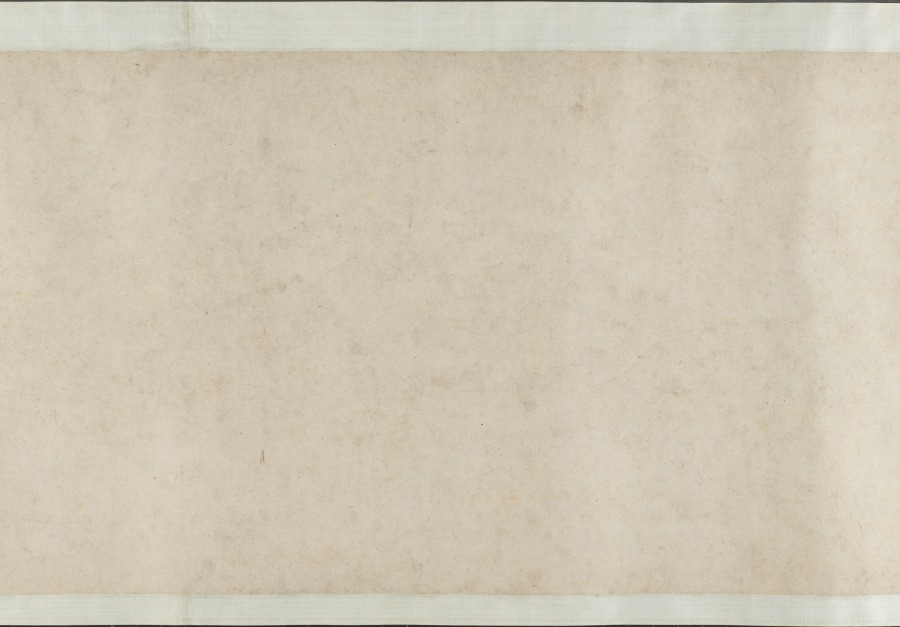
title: Garden for Solitary Enjoyment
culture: China, Ming dynasty (1368–1644)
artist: Qiu Ying (Chinese, 1494–1552)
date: 1515–52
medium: Handscroll; ink and light color on silk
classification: Painting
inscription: Accompanying text of an essay together with seven poems of Sima Guang (1019–1086) and one poem of Su Shi (1037–1101) written by Wen Zhengming (1470–1559) in 1558.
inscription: 2 colophons and 82 seals: 4 seals of Wen Zhengming 文徵明 (1470–1559); 59 seals of Xiang Yuanbian 項元汴 (1525–1590); 1 colophon, dated 1644, and 7 seals of Xiang Yukui 項禹揆 (c. late 1500s–1659); 1 colophon, dated 1880, and 2 seals of Weng Tonghe 翁同龢 (1830–1904); 2 seals of Ch'eng Chen-i (19th c.); 1 seal of Han Ch'ung (19th c.); 4 seals of Wan-go H. C. Weng 翁萬戈 (1918–2020); 3 seals unidentified.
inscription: Colophon by Xiang Yukui 項禹揆 (c. late 1500s–1659): The painting of The Garden for Self-enjoyment on the right by Shih-chou, Mr. Qiu [Qiu Ying] is in the style of Li Lung-mien. Its mood is peaceful, as if meeting the ancient gentlemen face to face among the brushes and silk; it lifts one above the sordid bustle of life. Formerly, my late father handed me this scroll which had only the painting without the written essay. I considered asking a good calligrapher to write the essay to add to it but was afraid that the quality of the writing would not match the painting. Several years later, I saw at a friend's house this essay and poems (of Ssu-ma Kuang] written by Hengshan [Wen Zhengming], once owned by my grandfather; so I spared no expense to obtain it. I rejoiced at this and said: "The divine swords are finally united. How things are pre-destined!" Now my friend Chang Kung-chao's technique for mounting [painting and calligraphy] is excellent. Therefore by daring to take them out and join them together, I can preserve this beautiful story of singular reunion. Xiang Yukui recorded at Hai-yeh-t'ang [hall] two days before New Year's Eve in the jiasheng year of the Chongzhen era [1644]. trans. LYSL/HK/WKH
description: Garden of Solitary Enjoyment refers to a site built in 1073 by the statesman Sima Guang (1019–1086) after he had retired to Luoyang, Henan province. Every spring, visitors would flock to his garden. Each of its seven structures references a historic figure. Sima wrote: I channel streams [like Du Mu], to water flowers [like Bai Juyi], or trim bamboo [like Wang Huizhi]. . . . I know of no joy between heaven and earth that could take its place. Qiu Ying’s painting, created after an 11th-century version of the same theme, must have appealed to garden owners of the Ming dynasty, since it became the template for numerous Suzhou workshop copies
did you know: Sima Guang completed his monumental survey of Chinese history, Zizhi tongjian, in the garden depicted in this painting.